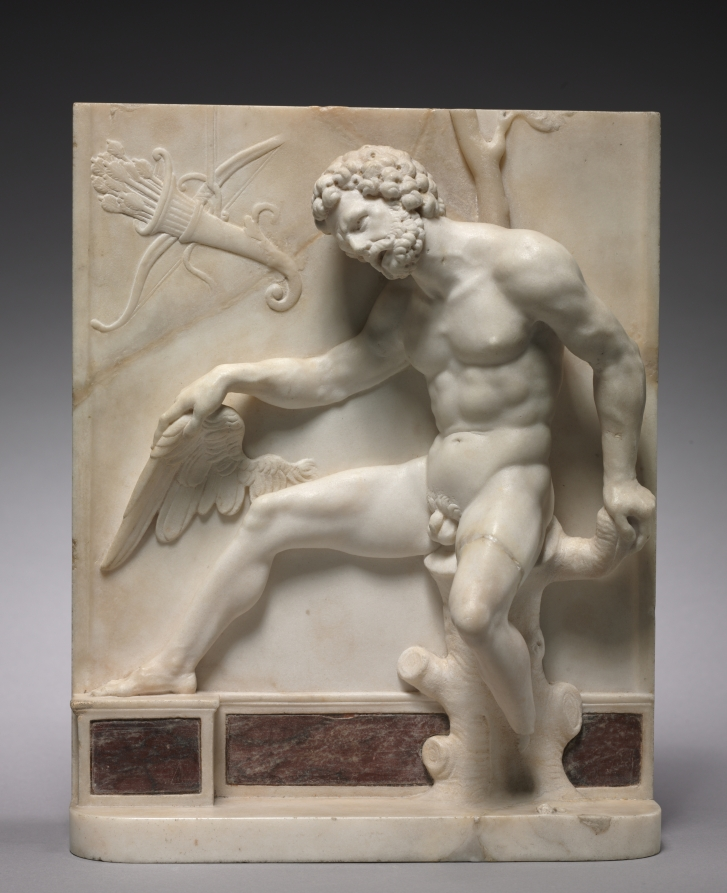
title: Philoctetes on the Island of Lemnos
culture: Italy, 16th century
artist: workshop of Giovanni Maria Mosca (Italian, 1495/99–1574)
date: c. 1510–1515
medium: marble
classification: Sculpture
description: A snake bit the Greek warrior Philoctetes en route to the Trojan War. The stench of the infected wound led the ship’s crew to abandon him on the island of Lemnos, where he fans the agonizing injury with a bird’s wing. The warrior’s noble suffering in the face of tremendous pain would have been a classical model of stoic composure, highly valued in Renaissance court culture.